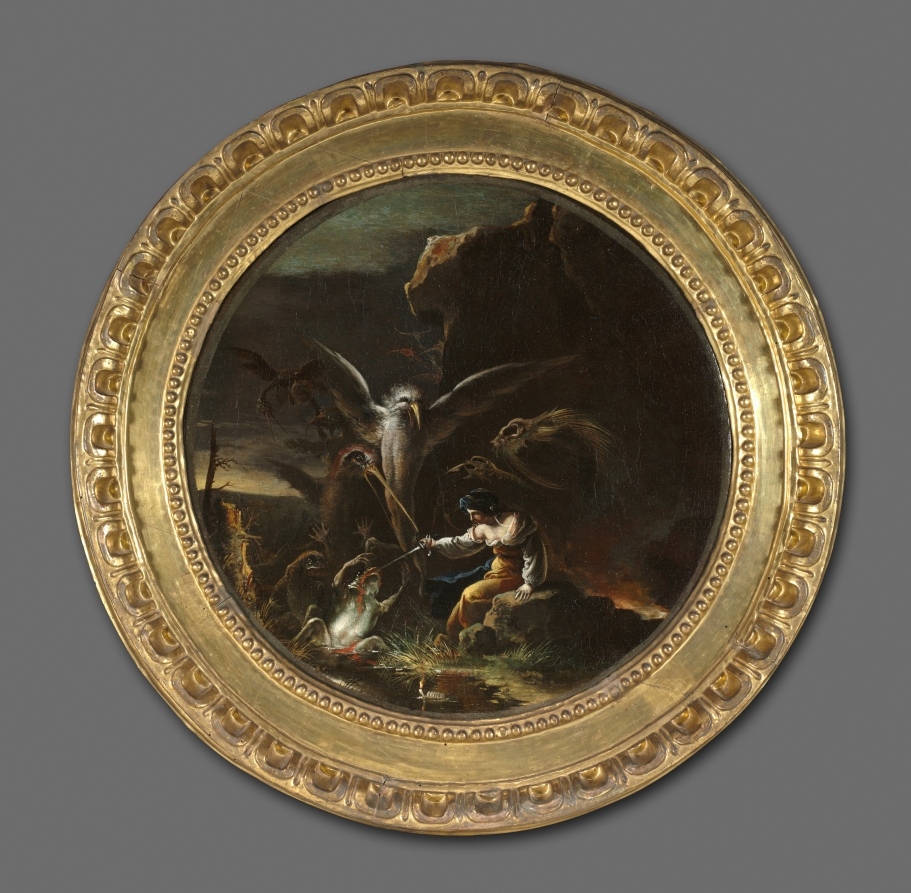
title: Scenes of Witchcraft: Morning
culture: Italy, 17th century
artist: Salvator Rosa (Italian, 1615–1673)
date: c. 1645–1649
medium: oil on canvas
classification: Painting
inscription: Signed: "SR [monogram]"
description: Rosa's first scene depicts a young witch who plunges her knife into a writhing amphibian at dawn. The dark clouds of daybreak and anthropomorphic crags provide a gloomy atmosphere, while malevolent birds with piercing beaks hover around the central stabbing, focusing the viewer's attention on the witch's vicious act. The only beautiful enchantress Rosa ever painted, her elegance and ability to transform men into animals evokes the goddess Circe. But Rosa wasn't interested in classical imagery; he inverted expectations by transforming Circe into an explicitly violent sorceress. Her calm expression makes the terrifying gesture of upraised human hands among the birds even more disturbing.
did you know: The artist chose the painting's shape to reference the foundational role of the circle in practicing magic.